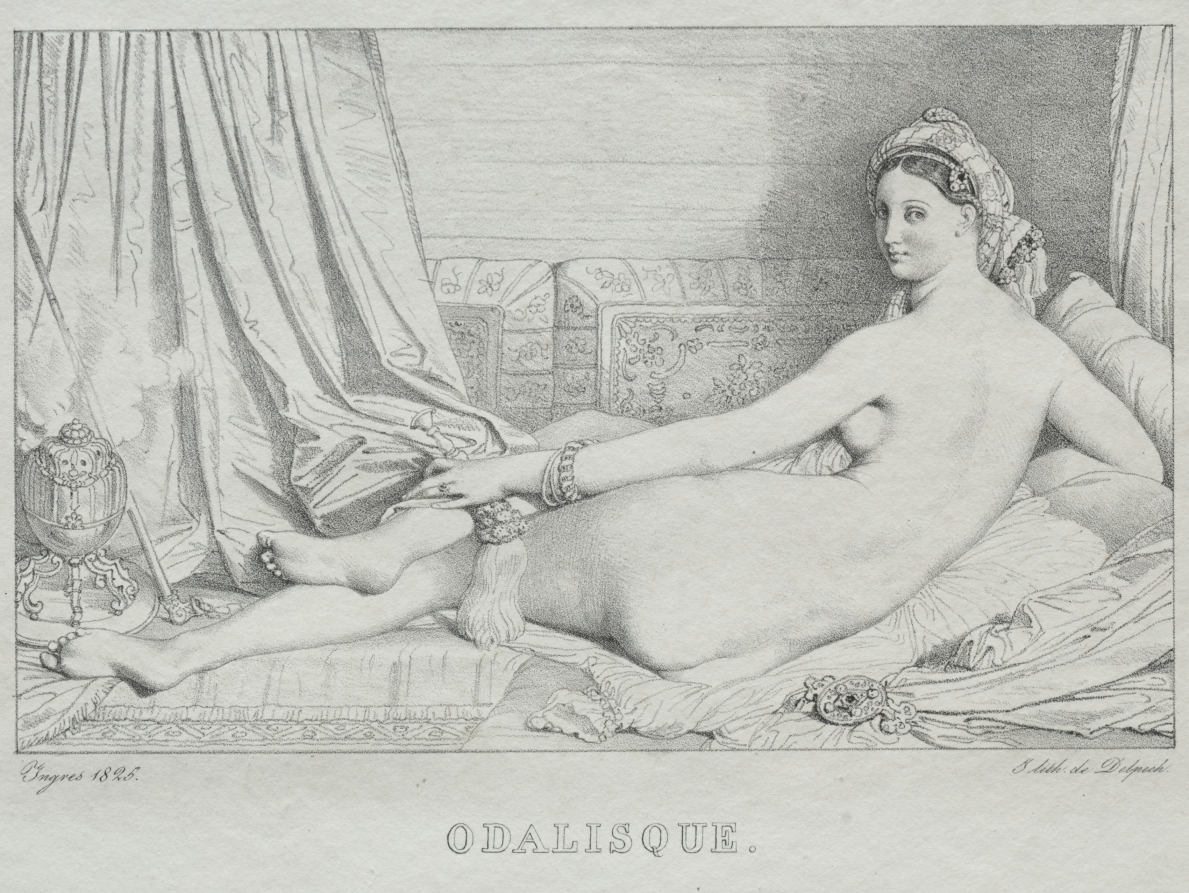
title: Odalisque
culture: France, 19th century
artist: Jean-Auguste-Dominique Ingres (French, 1780–1867)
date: 1825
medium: lithograph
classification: Print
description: Ingres executed this lithograph to reproduce and publicize an important picture that he had previously painted. However, the lithograph also represents experimentation with an unfamiliar medium, but the artist's assured draftsmanship makes the print successful.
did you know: The female nude seen here represented Ingres's conception of ideal beauty.